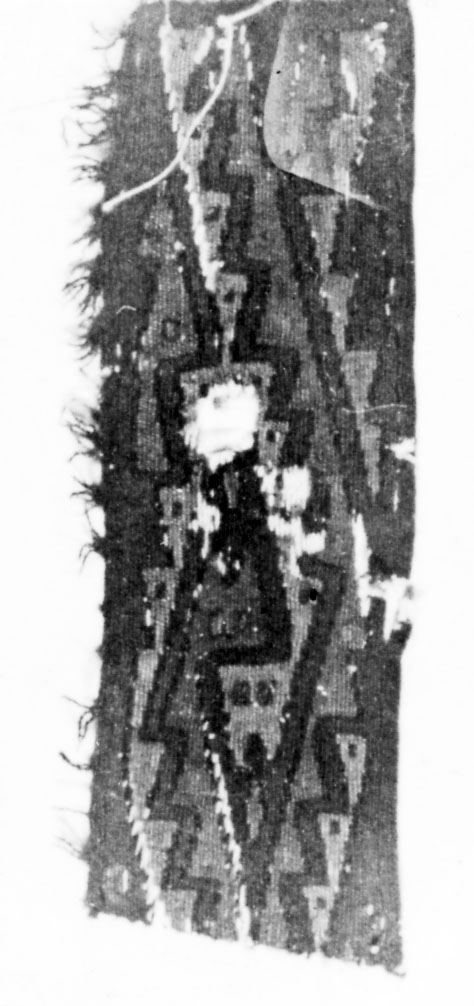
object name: Textile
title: Fragment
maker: Probably central coast, Peru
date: A.D. 1000/1476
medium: Slit tapestry weave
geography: Peru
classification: textile; weaving